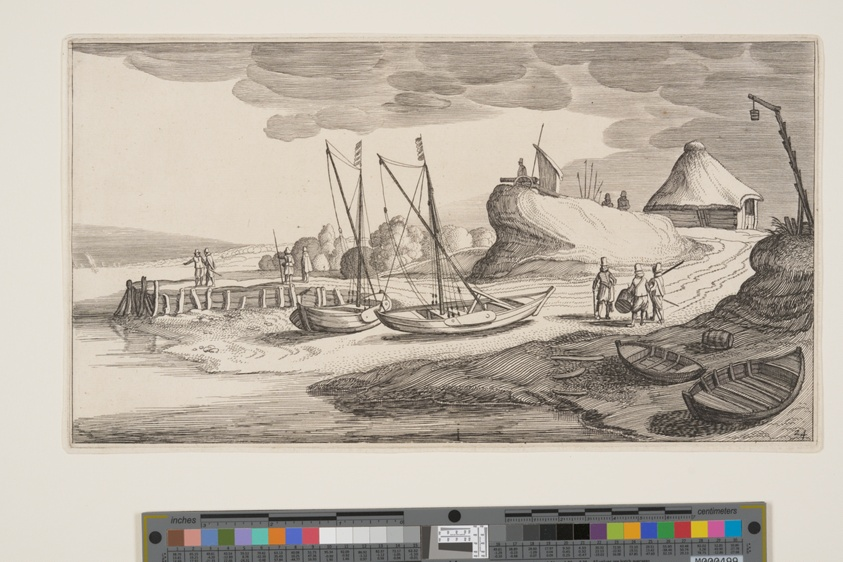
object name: Print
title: Boats Ashore Near a Watch-Tower, from Landscapes (Playsante Lantschappen)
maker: Attributed to Claes Jansz. Visscher II (Dutch, 1586-1652); after Jan van de Velde II (Dutch, c. 1593-1641)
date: c. 1641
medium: Etching, with engraving, on ivory laid paper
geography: Netherlands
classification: etching; paper; print; prints and drawing